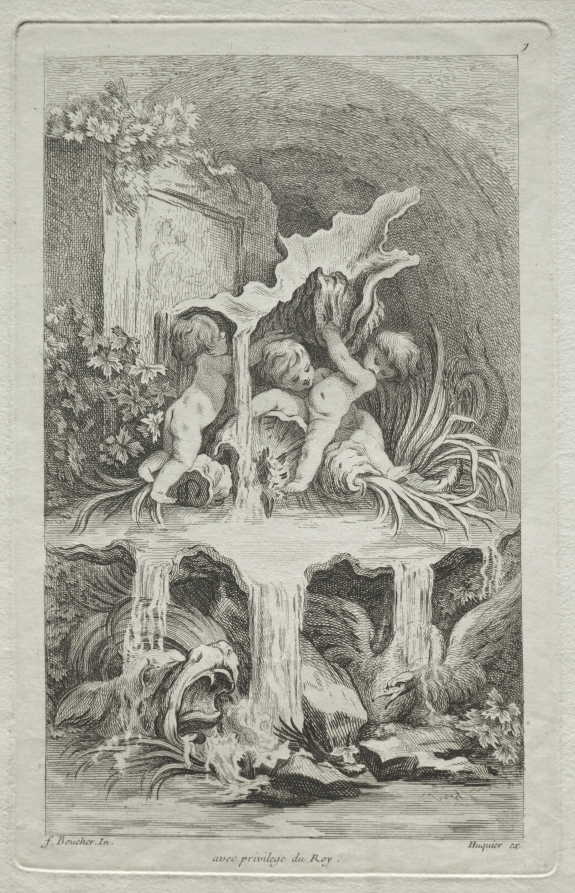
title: Book of Fountains: No. 7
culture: France, 18th century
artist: Gabriel Huquier (French, 1695–1772)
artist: after François Boucher (French, 1703–1770)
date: c. 1736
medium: etching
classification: Print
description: Boucher was one of the most prolific designers of ornament prints. With their aquatic motifs and gracefully curving and scalloped forms, these designs for fantastic, even bizarre fountains perfectly illustrate the whimsical Rococo approach. Derived from the French word for shell, rocaille, the Rococo was a light, playful style filled with shell motifs (which stemmed in part from a vogue for collecting shells), naturalistic curves, scrolls, and plant forms.